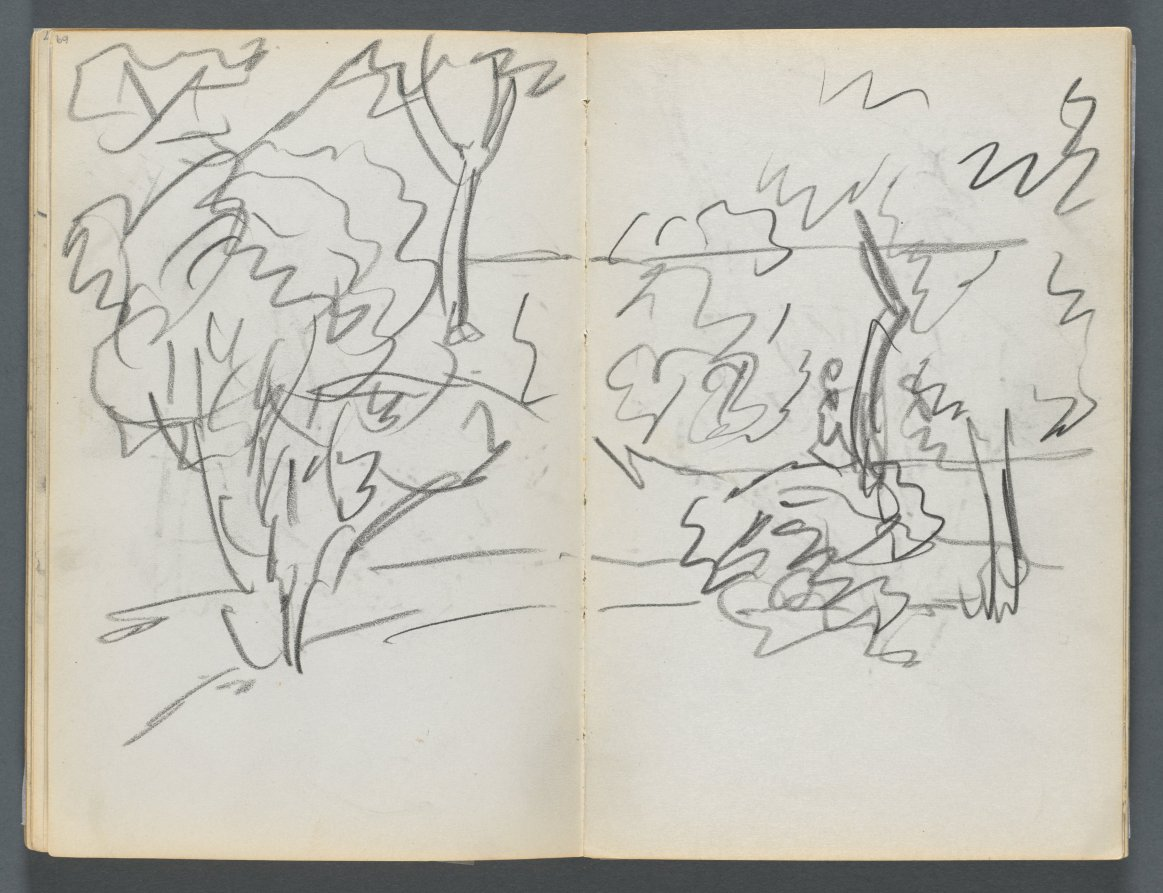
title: Sketchbook, The Dells, N° 127, page 068 & 69: Landscape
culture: America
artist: Maurice Prendergast (American, born Newfoundland [now Canada], 1858–1924)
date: c. 1919–1921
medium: graphite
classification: Bound Volume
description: This sketchbook contains 59 pages of graphite drawings and 16 watercolors made at various locations on Cape Ann, Massachusetts.